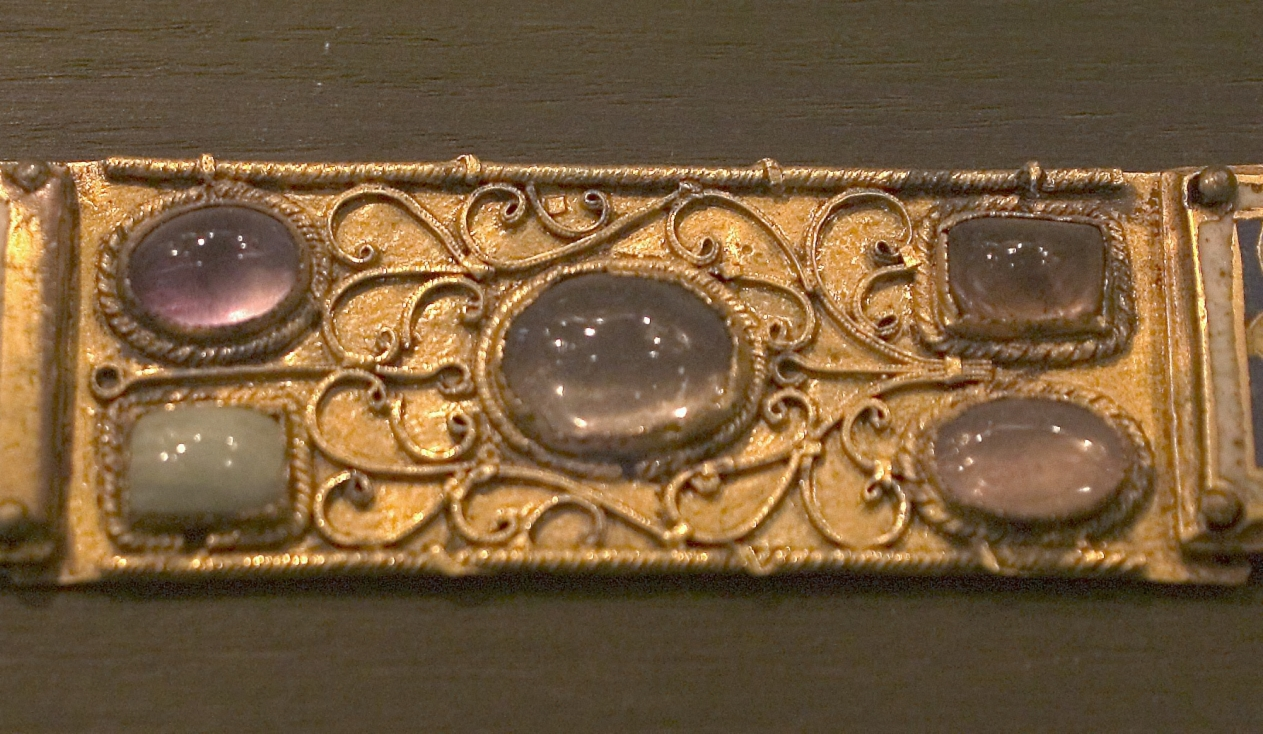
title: Decorative Plaque, Probably from a Reliquary Shrine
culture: Germany, Cologne?, Romanesque period, 12th century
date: c. 1200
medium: gilded copper, gold wire, cabochons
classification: Enamel